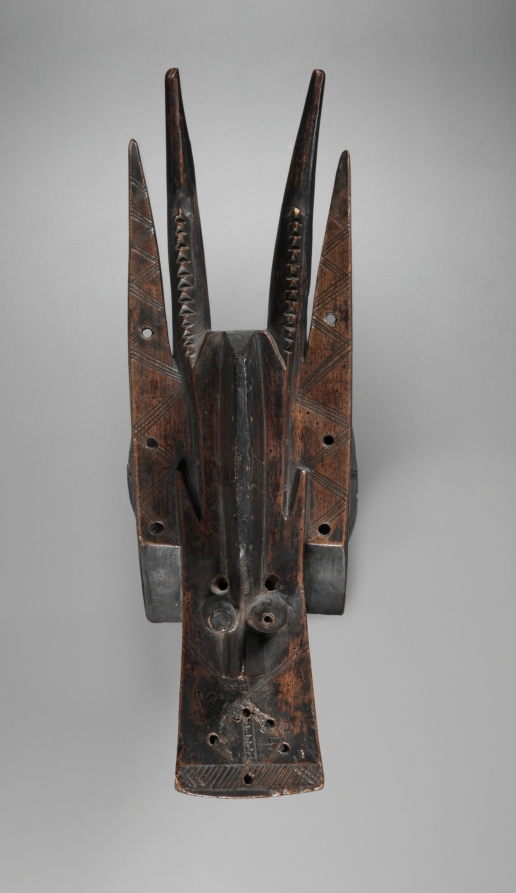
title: Helmet Mask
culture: Africa, West Africa, Mali, Malinke-style blacksmith-carver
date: mid- to late 1800s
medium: Wood and probably resin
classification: Mask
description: Combining animal and human traits, this example of a genre of mask called suruku, meaning “hyena,” most likely belonged to the Korè, one of six power associations that the Malinke would have adopted from their Bamana neighbors. The Korè is concerned with the circumcision and initiation of male youths into adulthood. The mask probably served as one of the symbols of the different Korè classes.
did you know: Holes along the top ridge of this mask once held a crest made of cane, red fibers, and cowrie shells.